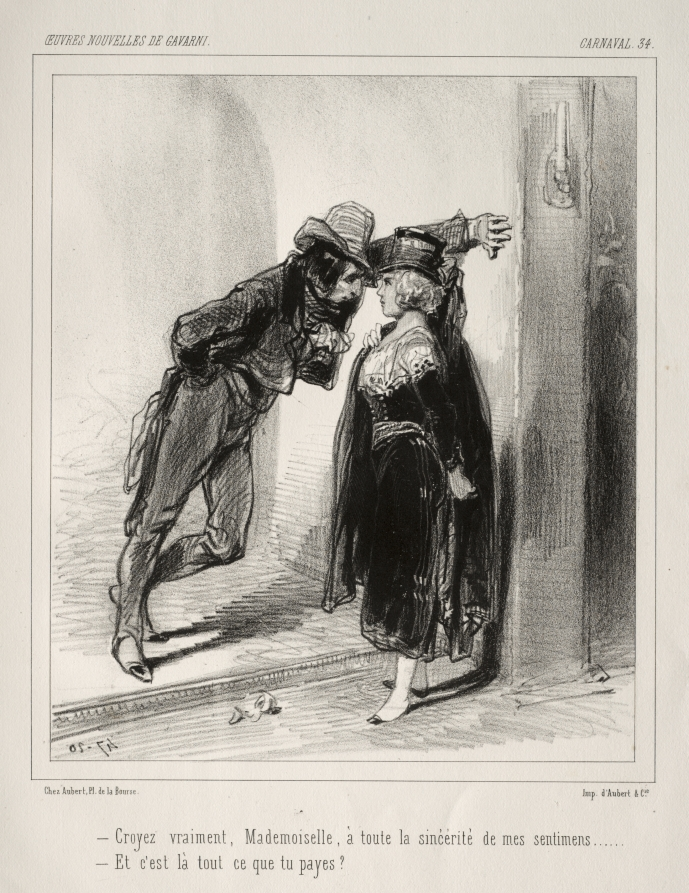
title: Carnaval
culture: France, 19th century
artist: Paul Gavarni (French, 1804–1866)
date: c. 1841–47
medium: lithograph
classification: Print